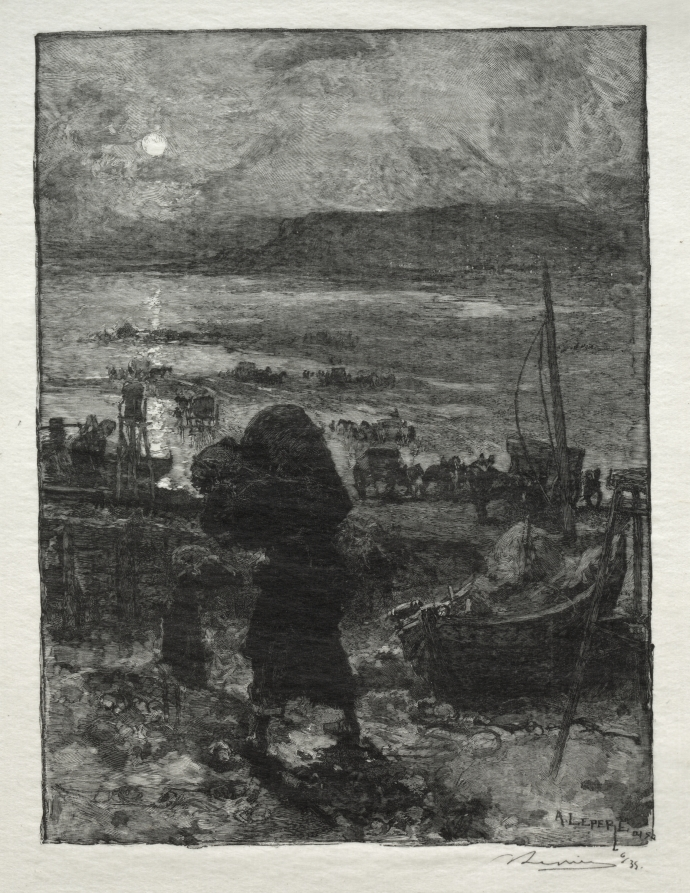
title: La Récolte du Sable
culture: France, 19th-20th century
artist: Auguste Louis Lepère (French, 1849–1918)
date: 1887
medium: wood engraving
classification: Print